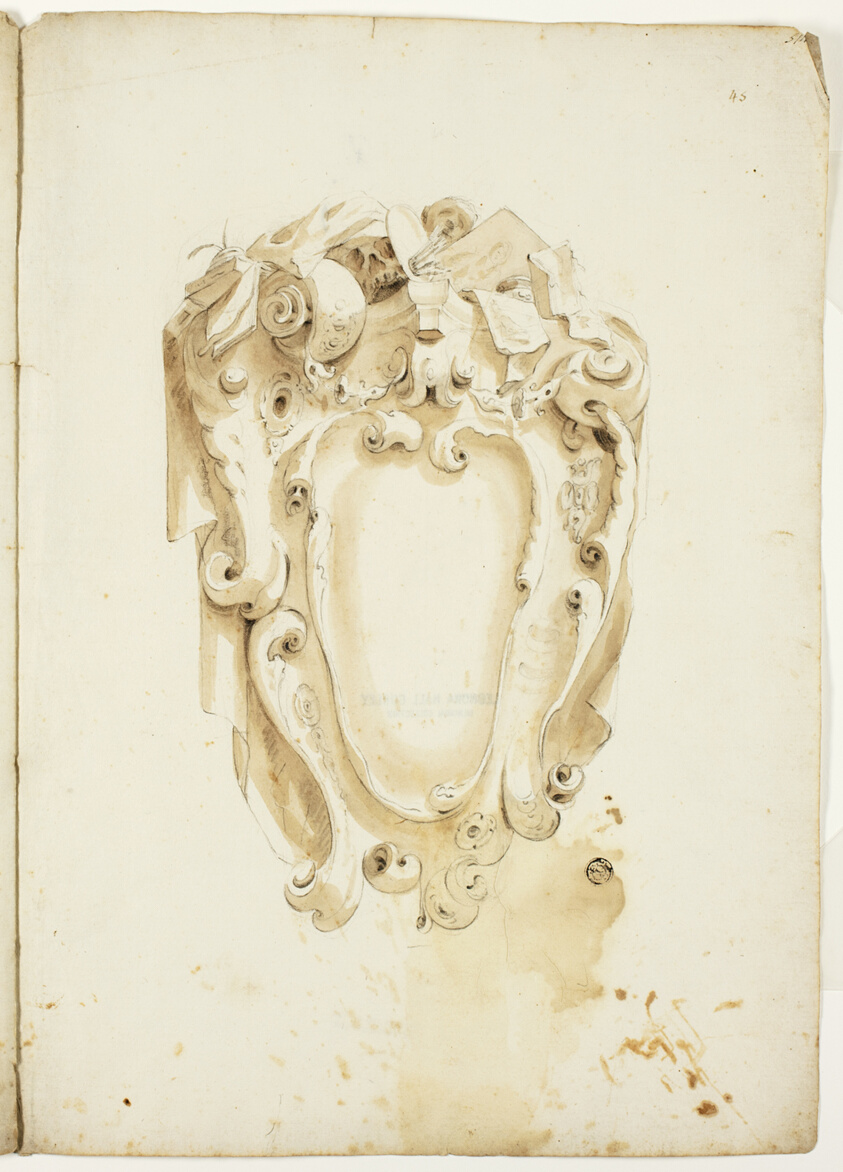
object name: Drawing and Watercolor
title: Design for Escutcheon, with Artist's Instruments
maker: Unknown Artist; possibly Italian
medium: Black chalk and brush and brown wash on ivory laid paper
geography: Italy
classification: chalk; drawings (visual works); prints and drawing